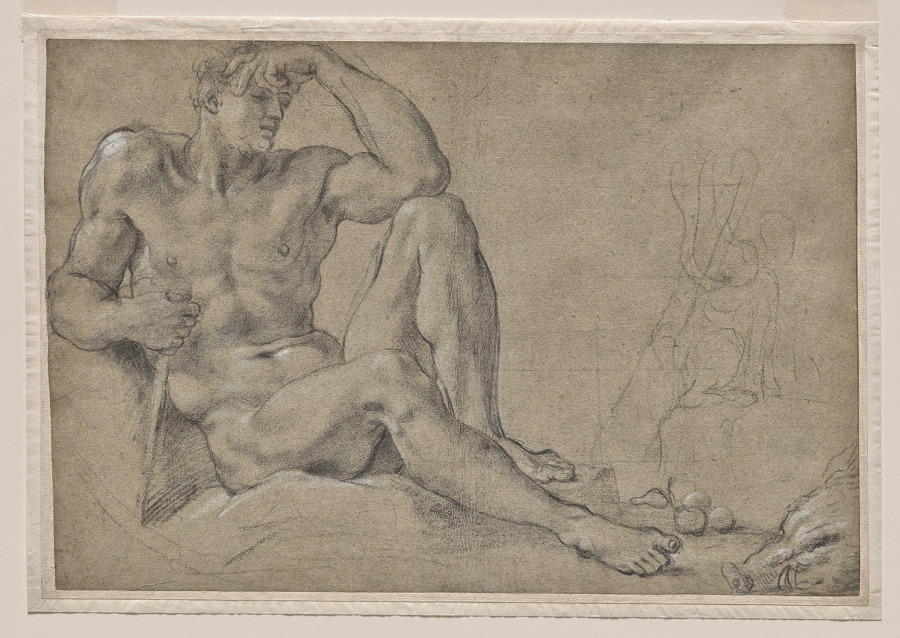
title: Hercules Resting (recto)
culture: Italy, 16th century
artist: Annibale Carracci (Italian, c. 1560–1609)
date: 1595–97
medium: black chalk heightened with white, squared in black chalk on right, incised (edges of figure)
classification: Drawing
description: To atone for the crime of killing his family, the Greek hero Hercules was required to perform twelve labors. In this final study for a fresco of this subject commissioned by Cardinal Odoardo Farnese for the ceiling of his study in his family’s Roman palace, Hercules rests, surrounded by evidence of his toil: the head of the Erymanthian boar he captured, the three golden apples of the Hesperides, and the hide of the Nemean lion on which he sits. The hero’s pose and exaggerated musculature are a result of the artist’s intense study of ancient models, and emulate specific antique sculptures depicting river gods in the Farnese collection. Carracci also worked with full knowledge of Michelangelo’s frescoes on the Sistine Chapel ceiling (1508-10), and the pose of Hercules may have been inspired by the reclining figure of Adam in Michelangelo's Creation of Adam scene.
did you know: The squares drawn lightly over this composition suggest that it was used to transfer the design to another surface such as a full-scale cartoon.